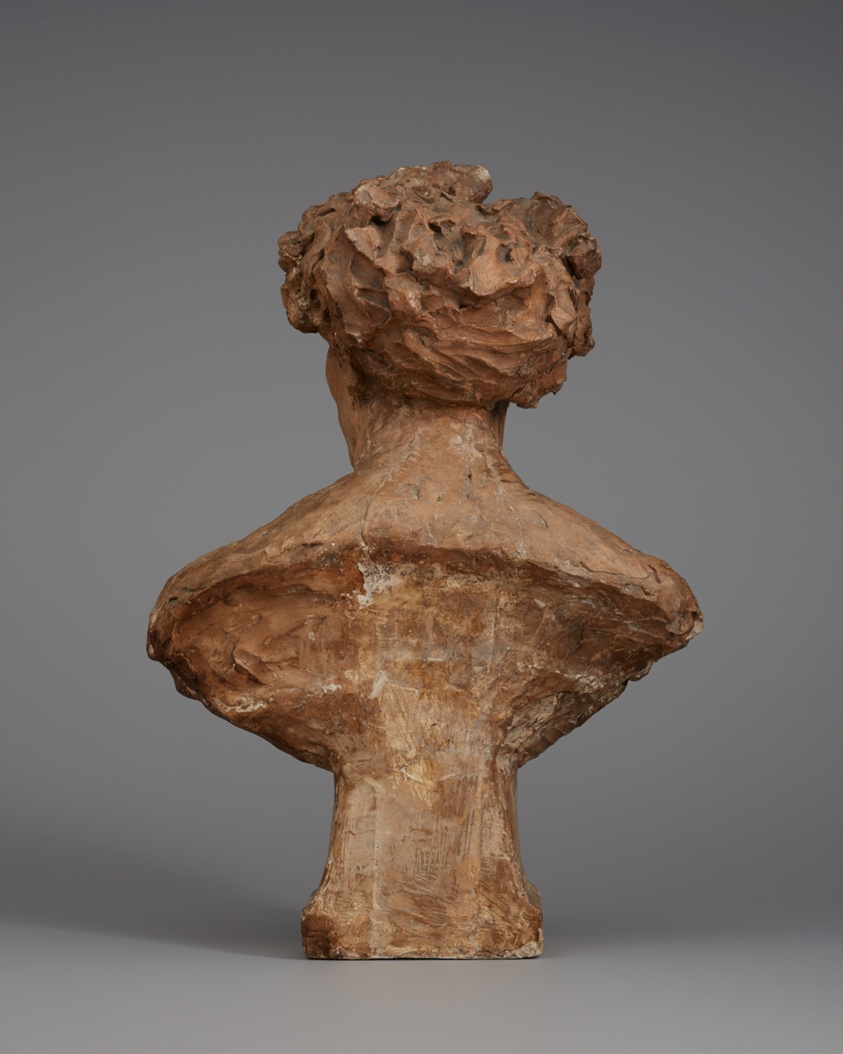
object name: Sculpture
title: Bust of a Young Man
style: nineteenth century, 19th century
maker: Aimé-Jules Dalou (French, 1838–1902)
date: 1877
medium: Patinated plaster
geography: France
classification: bust/head; sculpture; french; plaster; portrait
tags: portrait, portraits, portraits: male subject, man, busts, head